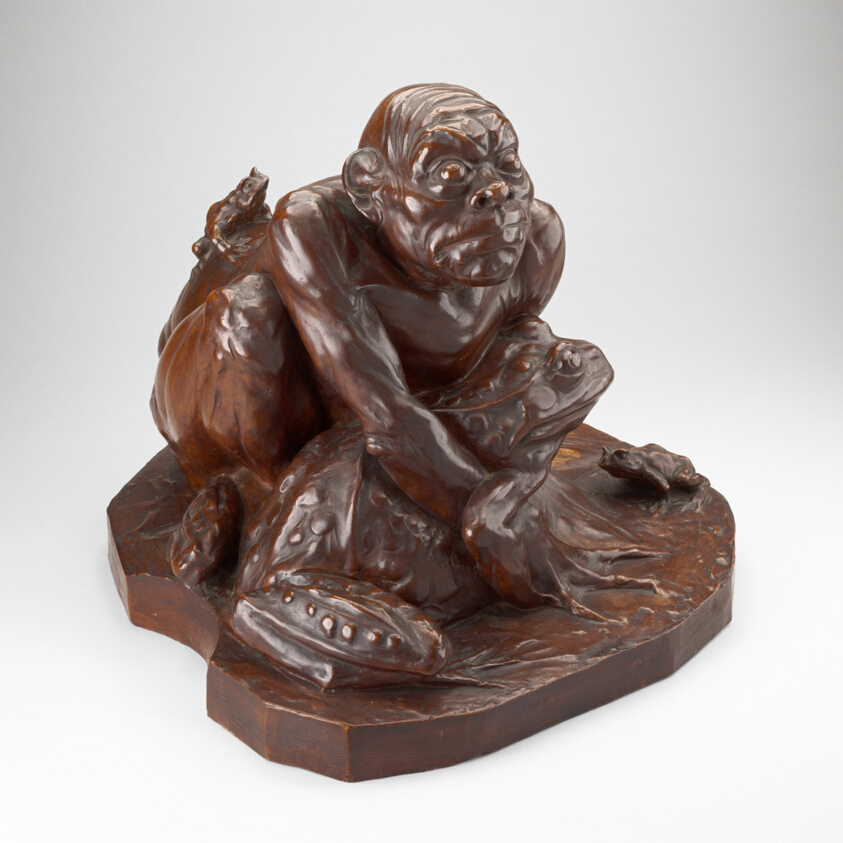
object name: Sculpture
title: Le Grenouillard (Frog-Man)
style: nineteenth century, 19th century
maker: Jean-Joseph Carriès (French, 1855–1894)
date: 1892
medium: Patinated plaster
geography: France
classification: statuette; plaster; french; sculpture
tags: frog, nudes, nature, man, animals